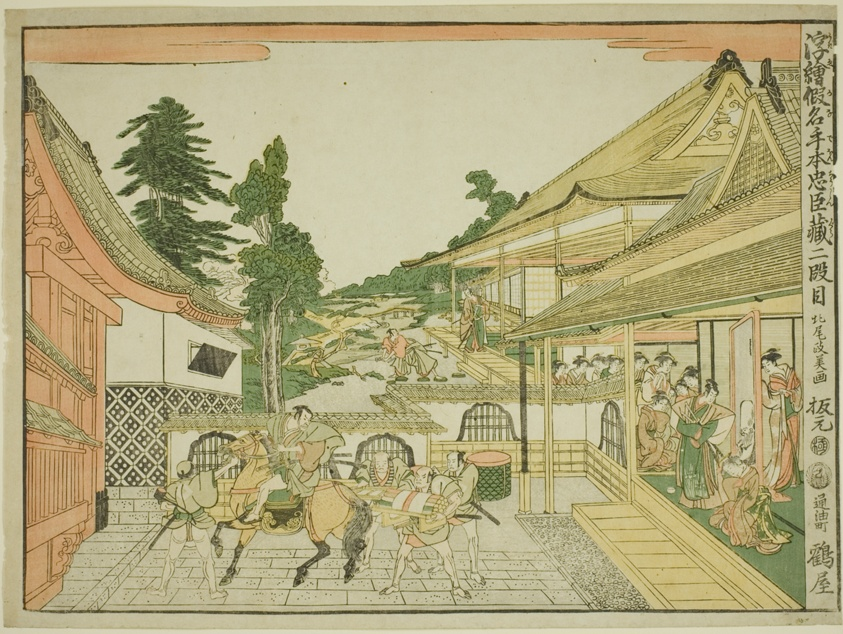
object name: Print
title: Act II (Nidanme), from the series "Perspective Pictures of the Storehouse of Loyal Retainers (Uki-e kanadehon Chushingura)"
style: Japanese (culture or style), edo (japanese period)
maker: Kitao Masayoshi (Kuwagata Keisai) (Japanese, 1764–1824)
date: c. 1791/94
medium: Color woodblock print; horizontal o-oban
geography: Japan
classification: woodblock; print